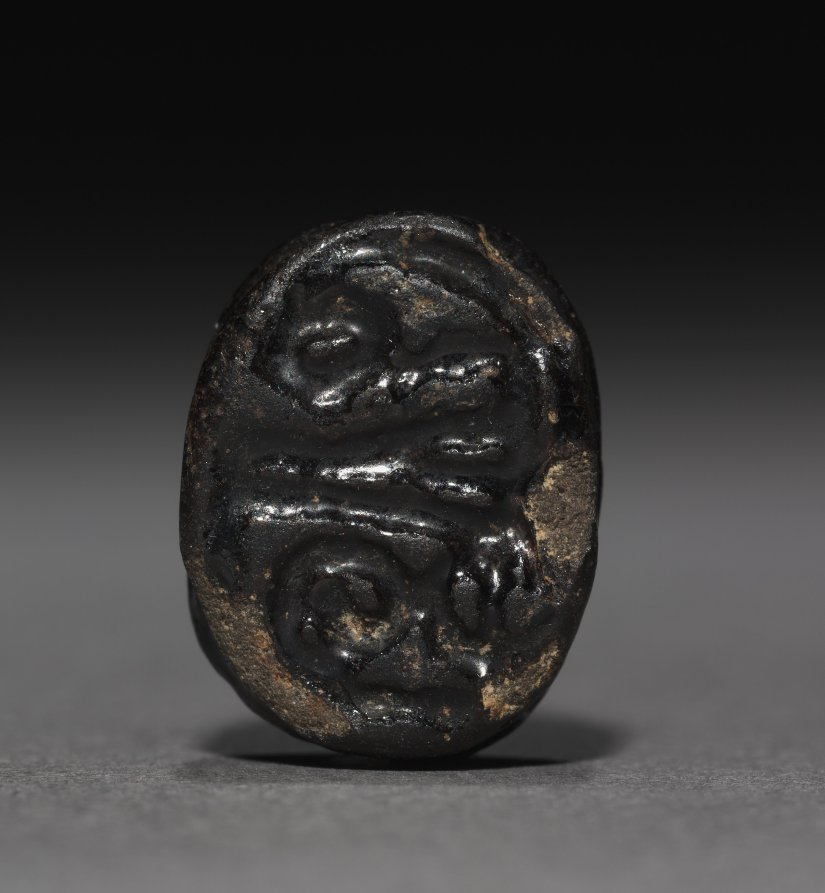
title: Scarab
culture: Egypt, Modern forgery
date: 1900–1914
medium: glazed ceramic (?)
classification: Scarabs